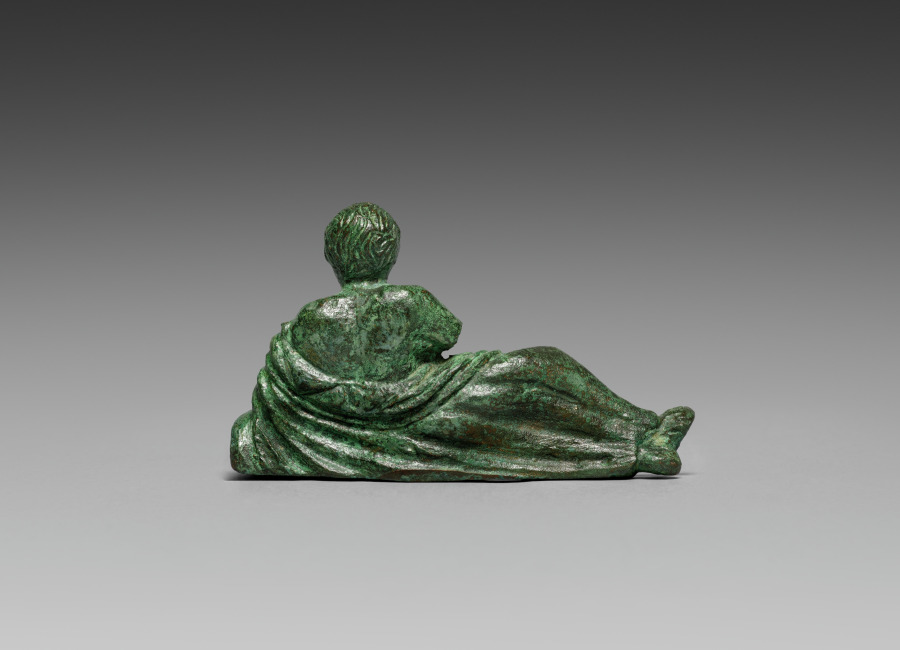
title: Vessel Ornament of Banqueter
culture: Etruscan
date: c. 400–375 BCE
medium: bronze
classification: Sculpture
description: This bronze banqueter figurine was one of six once adorning the rim of a large basin, now lost. Cast in molds with individualized details, most have grooves on their underside to attach to the basin. Minute traces of gilding remain on areas of clothing and skin (mostly visible only under magnification), suggesting that they may have been completely gilded. Two handles in the form of hippocampi, horses with serpentine tails, also belonged to the basin and are now displayed at the Michael C. Carlos Museum at Emory University. The basin may have been used to hold liquid for a banquet, or was perhaps funerary. This bronze figurine lies on his side in the posture of an ancient banqueter. His right arm is broken off but may once have rested on his hip. The figurine wears a garland on his head and a himation draped loosely around his left shoulder, revealing a muscular chest. One leg is raised over the other and a foot is exposed. Specks of gilding remain on the chest and head, but is different in color than that on the other five figurines. Also unlike the others, this one bears a visible seam across its entire length and has no groove underneath.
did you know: This reclining male banqueter demonstrates the posture of symposium guests.